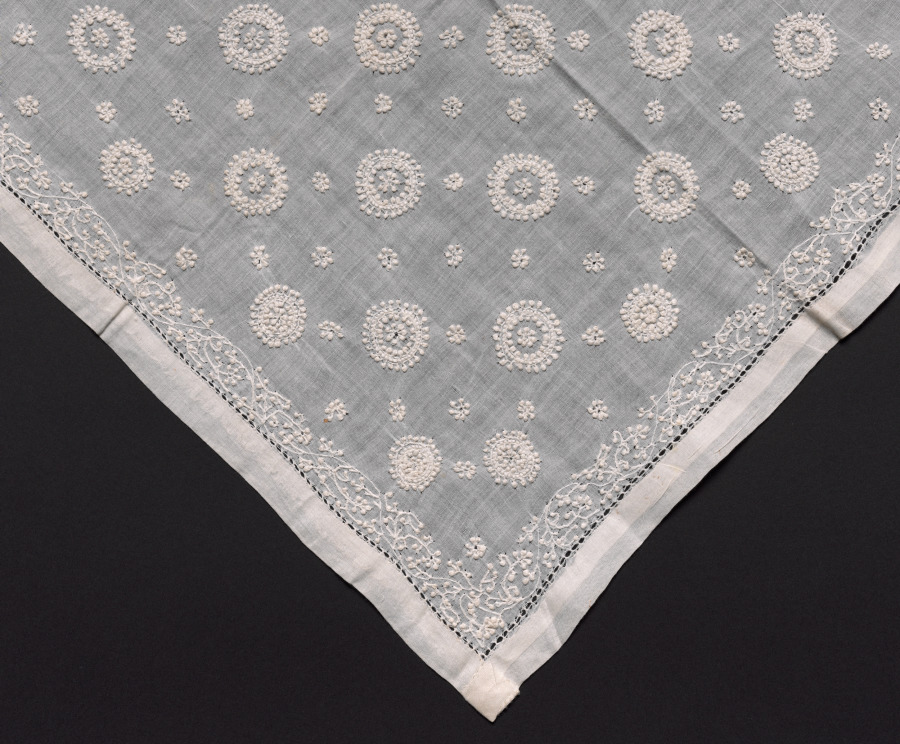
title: Square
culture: France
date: 1800s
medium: Plain weave linen: embroidered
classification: Embroidery